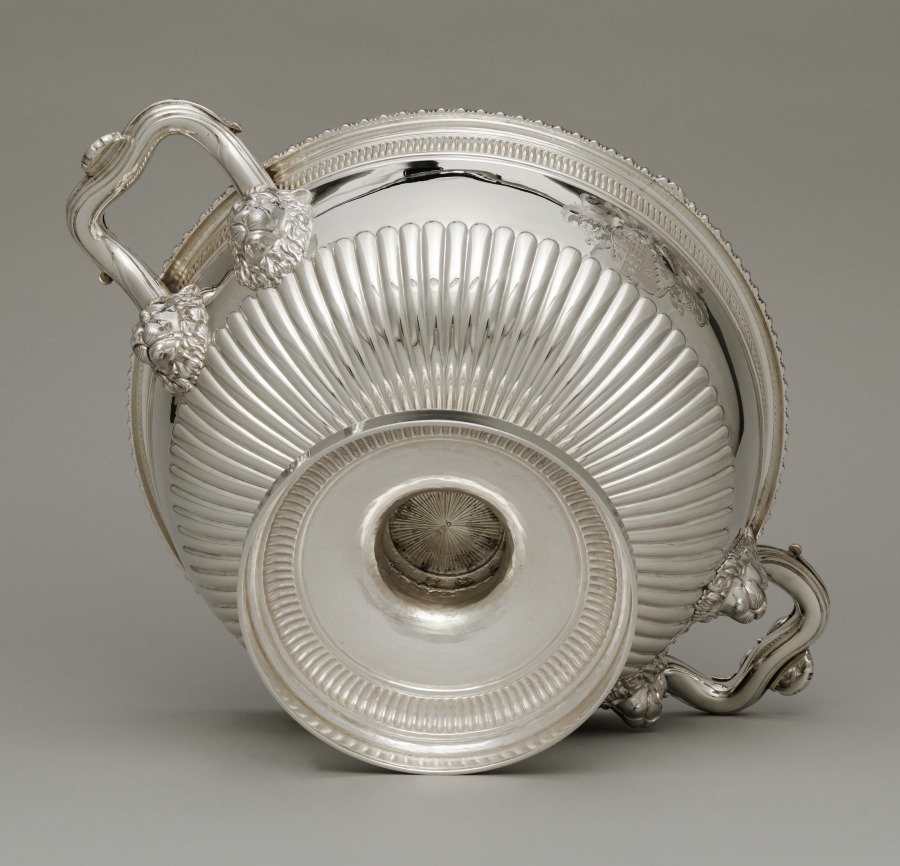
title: Tureen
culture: England, London, 19th century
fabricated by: Paul Storr (British, 1771–1844)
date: 1812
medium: silver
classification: Silver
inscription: coat of arms: Hutton impaling Chaytor; crest: Hutton. (Arms of Timothy Hutton (1729-1864) of Marske and Clifton Castle, Yorkshire, and his wife Elizabeth Chaytor of Spennithorne Hall, who were married in 1804.)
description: Silver fulfilled a prominent role in projecting wealth, status, power, and ritual in British life during the 1600s and 1700s. Elaborate forms such as this tureen, with its acanthus leaves and fluted detailing, not only represented wealth in its sheer silver weight but also provided royal and aristocratic owners a surface for displaying engraved coats of arms. The arms of the High Sheriff of Yorkshire, Timothy Hutton and his wife Elizabeth Chaytor of Spennithorne Hall in northern England are engraved on this tureen by Paul Storr, one of the most prominent London silversmiths of the period.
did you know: This tureen is accompanied by a cover and stand. See cover record.